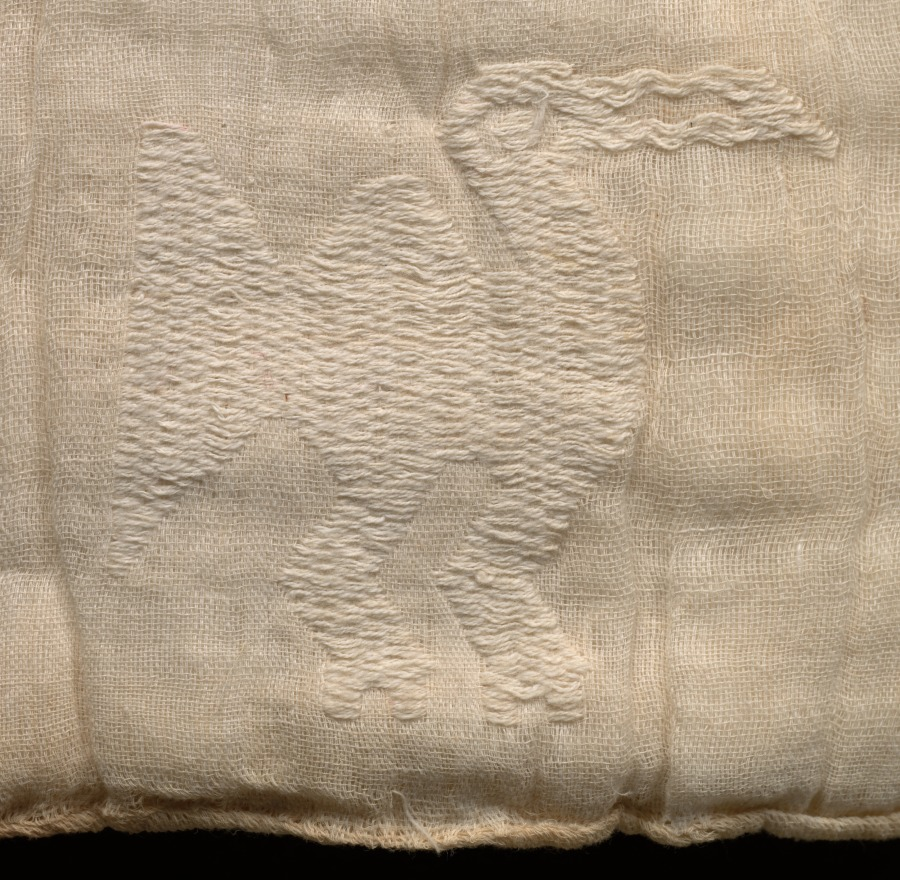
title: Padded Hat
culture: Peru, North Coast, Chimú style, 1200-1460s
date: 1460–1625 (radiocarbon date, 95.4% probability)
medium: cotton; plain weave, brocaded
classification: Garment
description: This garment may have been found with others in the collection that formed a matched set worn by a noble of the Chimú, who rose to power on Peru’s north coast after 1000 AD.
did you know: The Chimú forged an empire that thrived until the 1460s, when the Inka incorporated it into their own imperial domain.